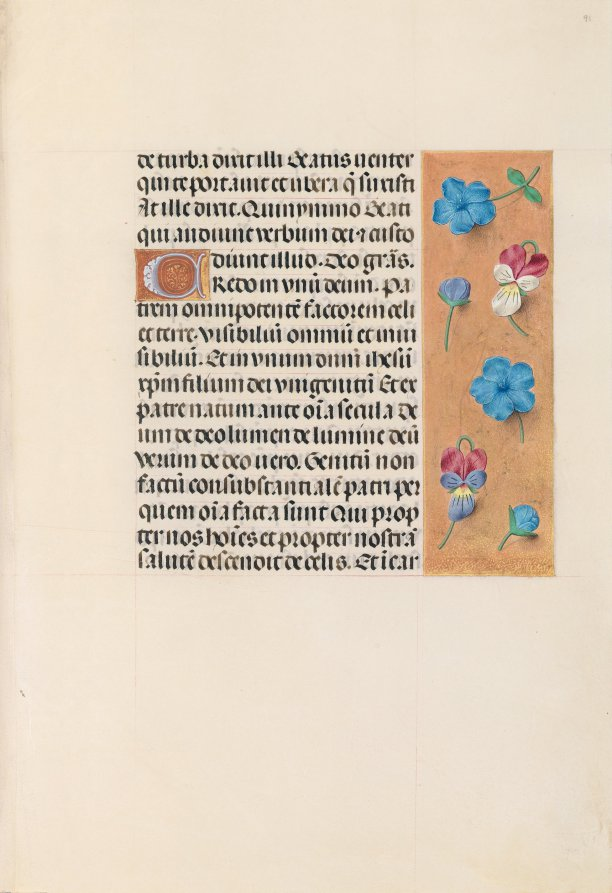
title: Hours of Queen Isabella the Catholic, Queen of Spain: Fol. 91r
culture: Flanders, Ghent and Bruges, late 15th century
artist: Master of the First Prayerbook of Maximillian (Flemish, c. 1444–1519)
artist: and Associates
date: c. 1500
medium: ink, tempera, and gold on vellum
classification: Bound Volume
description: This manuscript was illuminated by a circle of at least five highly organized manuscript painters active in the Flemish cities of Ghent and Bruges. The principal illuminator was Alexander Bening, who painted the majority of the book's miniatures. Manuscripts produced by this circle of artists are renowned for the decoration of their borders, which typically feature a rich variety of realistically-painted flowers, birds, and butterflies. This prayer book, called a book of hours, was intended not for a cleric, but for the private devotions of a lay person-in this case, Isabella the Catholic, Queen of Spain (1451-1504). Isabella's coat of arms embellishes the book's frontispiece. It is unlikely that the book was commissioned by the Queen herself; rather, she probably received it as a diplomatic gift from someone courting her patronage, perhaps Cardinal Francisco Jimenez de Cisneros. A Franciscan friar, Jimenez was dependent upon Isabella for his advancement, first to the post of Queen's confessor in 1492, and then to Archbishop of Toledo in 1495.